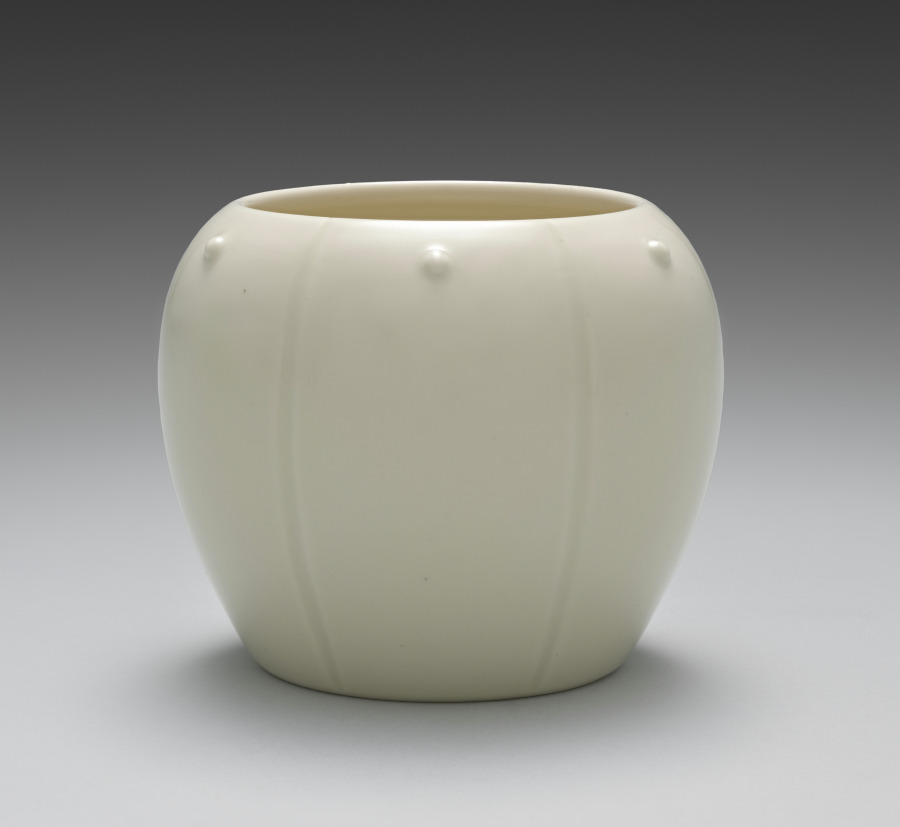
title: Container from Lit Charcoal and Ash Containers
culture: Japan, Meiji period (1868–1912)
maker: Seifū Yohei III (Japanese, 1851–1914)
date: 1893–1914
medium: One from a set of four containers; porcelain with molded design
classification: Ceramic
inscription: 清風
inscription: The storage box for this set is inscribed and impressed with seals.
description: The box lid for these six-lobed lit charcoal and ash containers, or hiire, identifies them as kōhakuji, another of Yohei III’s translucent cream colors over ivory clay bodies. One might translate the name as “lustrous pearl[–glazed ivory] porcelain.” A hiire was filled with ash with burnt coals at the center so that embers and tobacco ash could be discarded safely during a gathering. Each of the lobes on the containers has a round protrusion set below the rim. The studlike pattern is called ruiza. The term is also used to describe the pattern that rings the shoulder of some flower vases or metal kettles used in chanoyu.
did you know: The Seifu studio generally followed the standard practice in Japan for identifying the artist and object in box inscriptions.